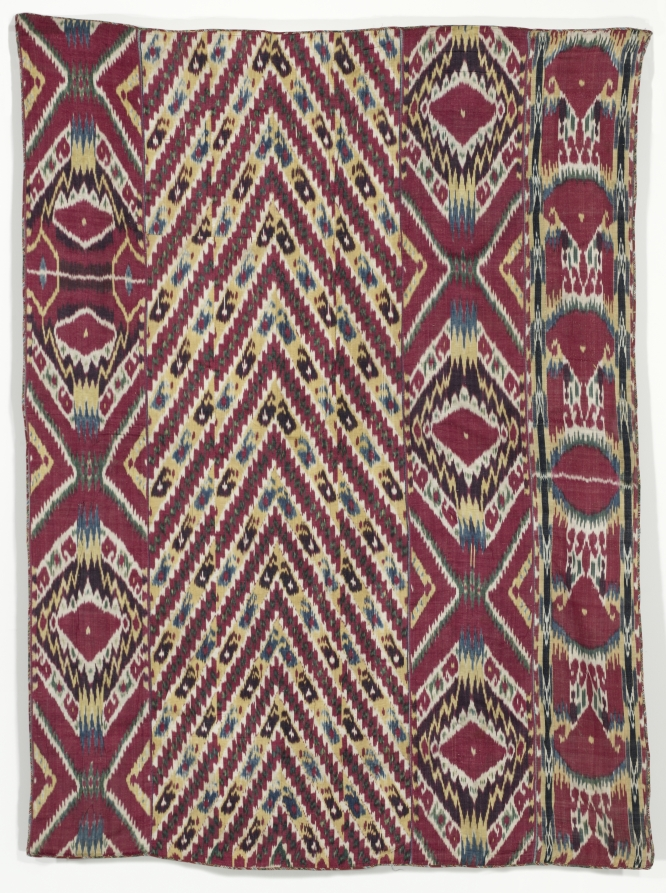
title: Wall hanging (pardah)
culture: Uzbekistan, Bukhara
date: 1850–75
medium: warp ikat, warp-faced plain weave; silk warp; cotton weft; 5 panels./ lining: printed cotton, plain weave; 2 panels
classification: Textile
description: Eye-dazzling patterns with saturated colors demonstrating the ikat technique provided vibrant wall hangings for the reception rooms of the urban elite in Central Asia. In this splendid example comprising five loom widths, three lengths display popular amulet designs while the two inner lengths are precursors to the bold chevron designs of the late 19th century. The irregular contours—telltale indicators of ikat—are masterfully controlled with five rich colors. In the ikat technique, designs are dyed on the warp (vertical thread) in a resist-dye process before being woven. Thread is tightly wrapped around the warp to prevent dye penetration in each area of color, beginning with the lightest shades to the darkest. This labor-intensive process produces vivid colors and fuzzy contours.